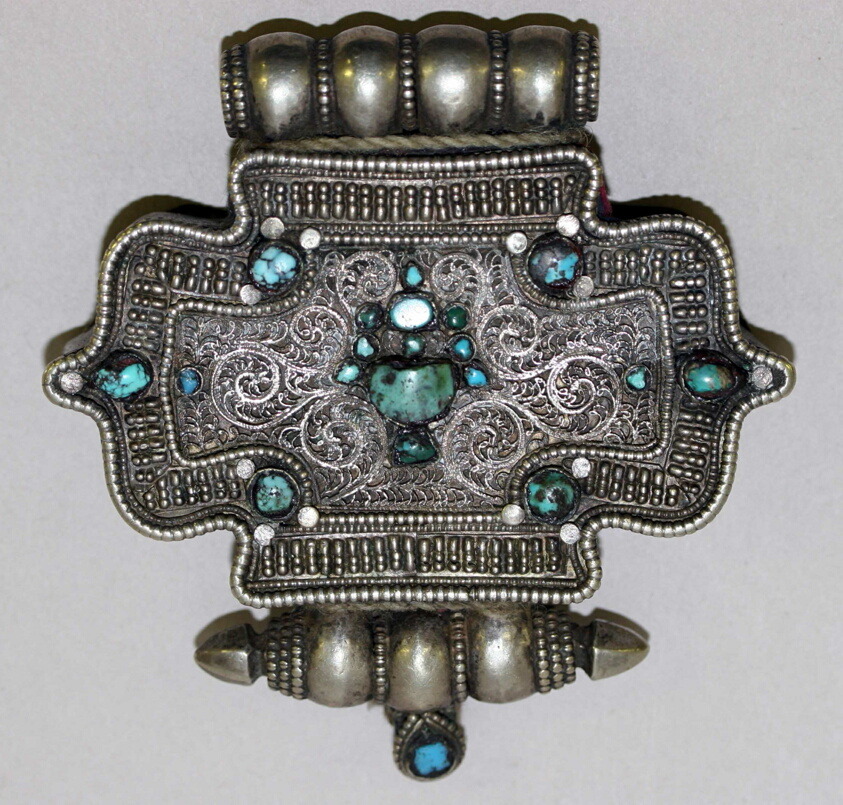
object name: Costume and Accessories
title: Woman's Amulet Box (Ga'u)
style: Himalayan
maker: Tibet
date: 18th century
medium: Silver and turquoise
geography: Tibet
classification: silver; metal; jewelry; asian art; costume